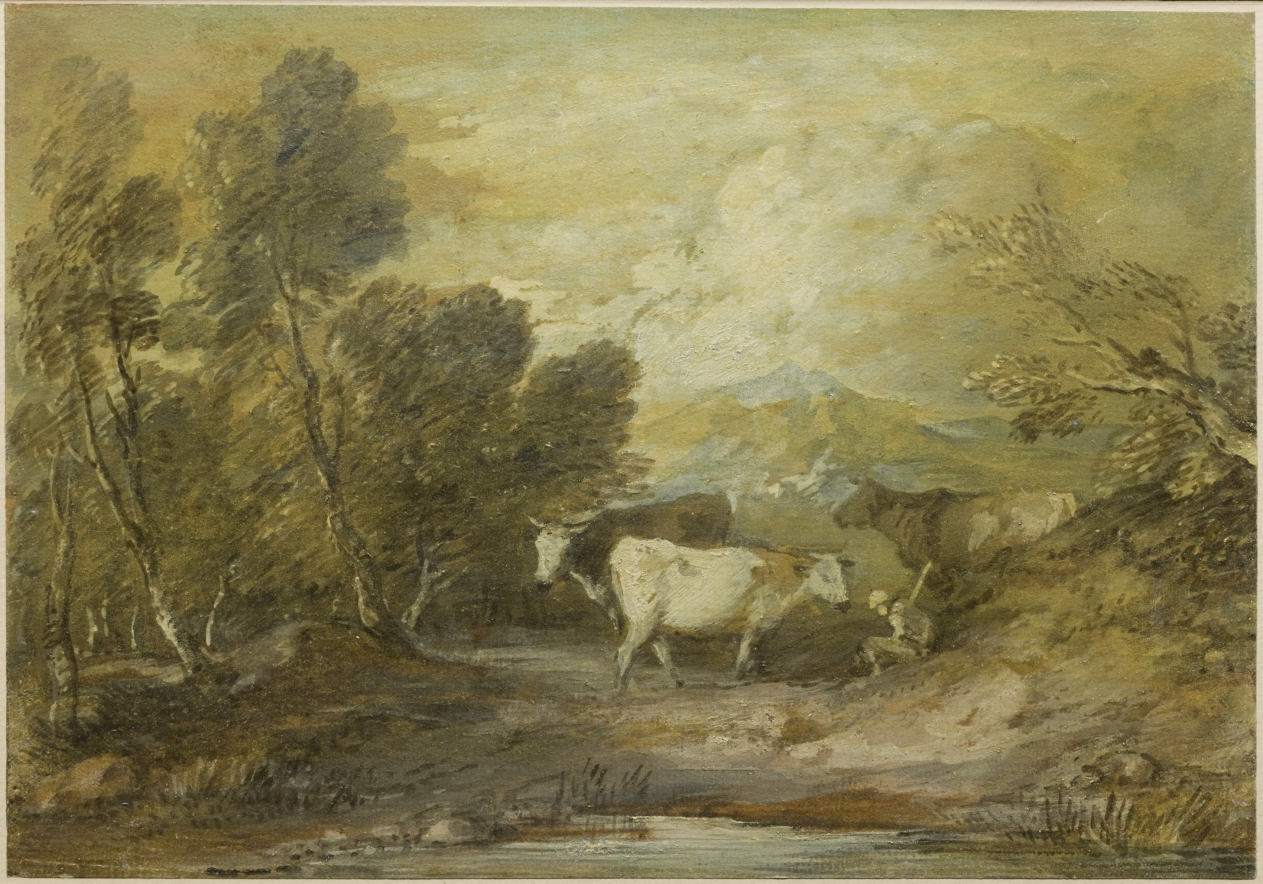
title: A Herdsman with Three Cows by an Upland Pool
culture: England, 18th century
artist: Thomas Gainsborough (British, 1727–1788)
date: mid-1780s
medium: watercolor, ink and oil paint heightened with white chalk ("Bristol lead white")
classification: Drawing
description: Although he was one of the most celebrated society portraitists of his day, landscape painting was Thomas Gainsborough’s love and lifelong pleasure. Here, delicate layers of watercolor, ink, oil paint, and chalk result in a jewel-like work on paper. The composition combines the rural scene of a herdsman and three cows with an imagined, majestic mountain view, mingling the pastoral with the sublime. The sheet was among a group of 14 landscape drawings that Gainsborough selected as a gift for a close friend.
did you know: Following the instruction of the influential painter and writer Jonathan Richardson, Gainsborough often arranged his landscape compositions with the brightest passage—here, the white cow and billowing clouds—near the center.